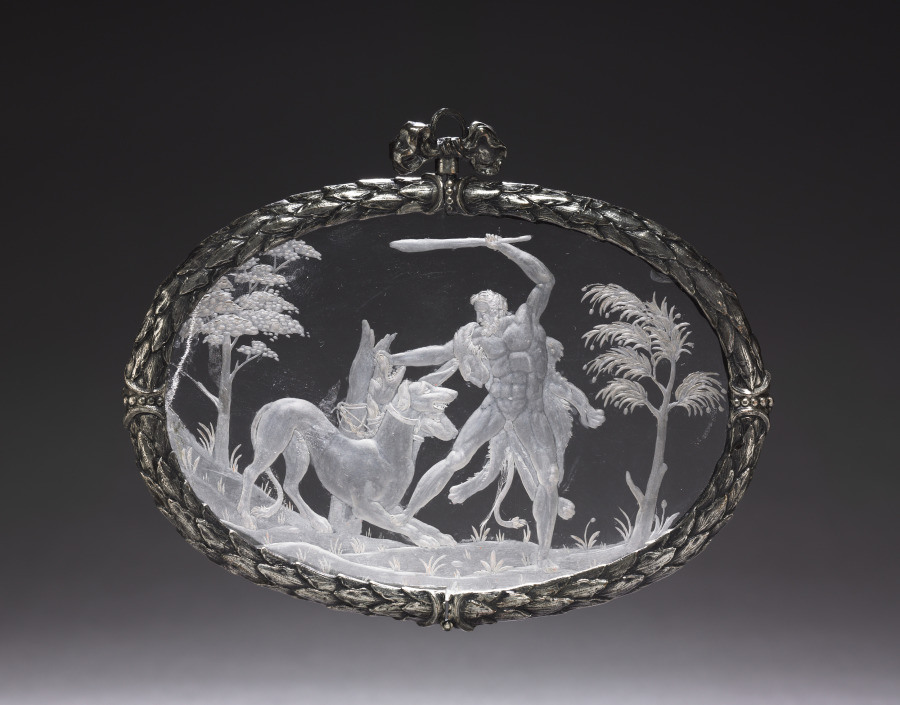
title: Hercules Conquering Cerberus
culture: Italy, 17th century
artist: attributed to Annibale Fontana (Italian, 1540–1587)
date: before 1584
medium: rock crystal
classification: Rock crystal